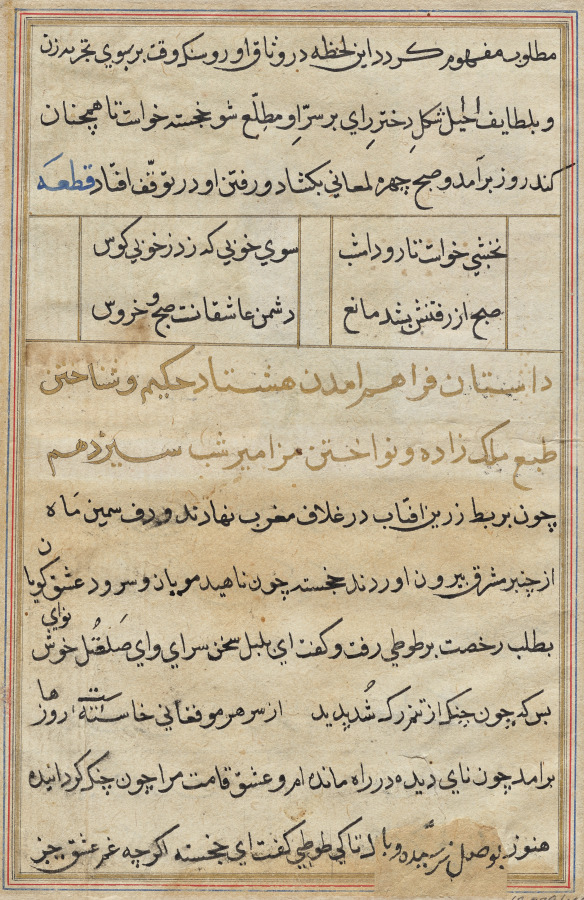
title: Page from Tales of a Parrot (Tuti-nama): text page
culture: Mughal India, court of Akbar (reigned 1556–1605)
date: c. 1560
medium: gum tempera, ink, and gold on paper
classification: Painting